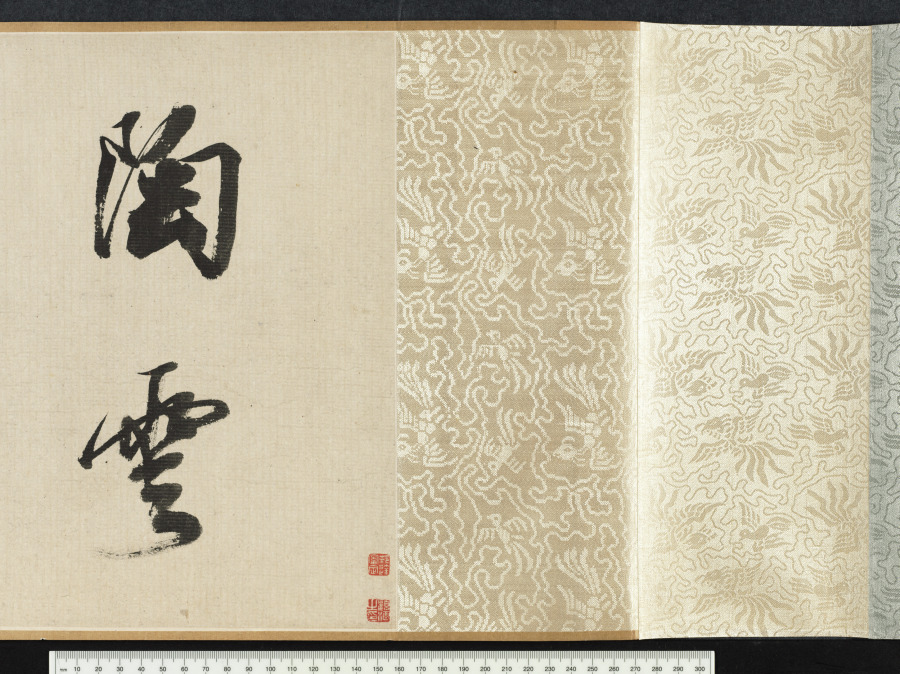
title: Chrysanthemums and Cabbage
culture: China, Ming dynasty (1368–1644)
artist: Tao Cheng (Chinese, active c. 1471–after 1502)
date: c. 1486 or before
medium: handscroll, ink and slight color on paper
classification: Painting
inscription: Artist's seal at beginning of painting: Yun hu 雲湖. Title by Wang Wenzhi 王文治 (1730–1802), date 1756. 2 seals of Wang Wenzhi 王文治 (1730-1802); 3 seals of Ku Yün (n. d.)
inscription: Section A (Chrysanthemums): 1 poem and 1 seal of Zhang Yuanzhen 張元禎 (1437–1507) - Jinshi, 1461; 1 poems and 3 seals of Ni Yue 倪岳 (1444–1501) - Jinshi, 1464; 1 poems and 2 seals of Zhao Xiang 趙祥 (life dates unknown) - Jinshi, 1469; 1 poems and 1 seals of Wu Xixian 吳希賢 (1437–1489) - Jinshi, 1464; 1 poems and 1 seals of Lü Chang 呂㦂 (1449–1511) - Juren, 1471; 1 poems and 3 seals of Fu Han 傅瀚 (1435–1502) - Jinshi, 1464; 1 poems and 1 seals of Feng Jue 馮珏 (life dates unknown) - Jinshi, 1478.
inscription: Chrysanthemums section, poem 1, by Zhang Yuanzhen 張元禎 (1437–1507): Several bushes of chrysanthemums grow in front of the Five-Willow Cottage,/ The yellow ones are really yellow and the white ones white./ This affable and decent fellow, young in years and unsophisticated,/ Has snapped one of the branches to dip in ink. (The Five-Willows Cottage was the home of the poet Tao Qian 陶潛 (Tao Yuanming 陶淵明, AD 365-427).) Chrysanthemums section, poem 2, by Ni Yue 倪岳 (1444–1501): Where at the Eastern Fence can you grieve for the Soul of the Xiang River?/ A man of upright character is mourned within the traces of ink./ White jade with a slight flaw would be a grievance forever,/ Later men should understand why even the roots of the flowers are washed. (Eastern Fence refers again to the poet Tao Qian 陶潛, while the Soul of the Hsiang River refers to the poet Qu Yuan 屈原 (c. 340–278 BC).) Chrysanthemums section, poem 3, by Zhao Xiang 趙祥 (life dates unknown): A clump of chrysanthemum grows in front of the bamboo pavilion,/ The winds of many autumns have blown since we parted beyond the river./ Straining wine through the official's cap of Tao [Qian] to prolong autumn's pleasures,/ The mists and clouds of ten thousand miles belong to the intoxicated. Chrysanthemums section, poem 4, by Wu Xixian 吳希賢 (1437–1489): It is a different spring if mulberry is planted during the latter part of the year,/ The dust of the world originally did not drop on clothing./ Who spills out ink under the Eastern Fence/ And paints so freely this portrait of chrysanthemums for the venerable Sir Tao? Chrysanthemums section, poem 5, by Lü Chang 呂㦂 (1449–1511): This full tray of ink for painting [flowers] at the Eastern Fence;/ Their whiteness or yellowness is not essential in capturing their beauty./ I don't have to go to Jiangnan to see them myself./ At my old house grow two or three branches. Chrysanthemums section, poem 6, by Fu Han 傅瀚 (1435–1502): Who daubed autumn flowers with ink/ As if they were dark dew on a branch tip only vaguely seen at evening?/ After the lazy clouds disperse, no one paints;/ A certain unconventionality pervades this painting. Chrysanthemums section, poem 7, by Feng Jue 馮珏 (life dates unknown): To satisfy his hunger, [the chrysanthemums] have at times entered the poetry of Qu Yuan;/ Taking up the wine cup, it felt close to Tao Qian./ [With them I am like] a lonely root sustained by deep water/ Or an old man to whose hair the color of youth returns.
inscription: Section B (Cabbage): 1 poem and 1 seal of Cai Qi 蔡圻 (life dates unknown) - degree information not known; 1 poems and 3 seals of Ni Yue 倪岳 (1444–1501) - Jinshi, 1464; 1 poem and 3 seals of Jiao Fang 焦芳 (1436–1517) - Jinshi, 1464; 1 poem and 3 seals of Li Dongyang 李東陽 (1447–1516) - Jinshi, 1464; 1 poems and 1 seals of Wu Xixian, signed “Xixian” 吳希賢 - Jinshi, 1464; 1 poems and 3 seals of Fu Han 傅瀚 (1435–1502) - Jinshi, 1464; 1 poems and 1 seals of Lü Chang 呂㦂 (1449–1511) - Juren, 1471; 1 poems and 2 seals of Zhao Xiang 趙祥 (life dates unknown) - Jinshi, 1469; 1 poems and 1 seals of Feng Jue 馮珏 (life dates unknown) - Jinshi, 1478.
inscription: Cabbage section, poem 1, by Cai Qi 蔡圻 (life dates unknown): The ink splashes are fresh from a frosty brush dipped in pond water;/ I can visualize that time when Yunhu 雲湖 [Tao Cheng] first showed his talents./ I lament the places where I scribbled before,/ Who would open them to inscribe a poem? (The first line is an allusion to the famous Jin dynasty calligrapher Wang Xizhi 王羲之 (AD 303-361), who practiced calligraphy so diligently at the edge of a pond that the water turned black with ink.) Cabbage section, poem 2, by Ni Yue 倪岳 (1444–1501): After rain the vegetables begin to grow;/ How are the colors of the masses lately!/ Once you get used to them, the tastiest parts are the ends of the roots;/ I don't know if they can be used for "seasoning soup." ("Seasoning soup" is an allusion to the statesmanship of a chief minister.) Cabbage section, poem 3, by Jiao Fang 焦芳 (1436–1517): This crop of purple stalks and green leaves is late and irregular;/ Now the rainy season is over for the Eastern Garden./ All the nobles nowadays dine on meat;/ Who of them knows the flavor of this [cabbage]. Cabbage section, poem 4, by Li Dongyang 李東陽 (1447–1516): It's always helped the honest man to sober up after drinks./ I intend to go to the deepest part of the stream-crossed garden/ To refresh myself in the fragrance and dew of evening. Cabbage section, poem 5, by Wu Xixian 吳希賢 (1437–1489): After rain, the white silk is filled with fragrant vegetables;/ How many times this happens in Mr. Tao's paintings./ On whom will you depend to present a memorial to the ruler?/ Don't let this color emerge on the faces of the people. (The last line is meant as a warning to officials: the color of the vegetables (green) may be pleasing in itself, but when it emerges on the faces of the starving poor, it signifies a badly governed world.) Cabbage section, poem 6, by Fu Han 傅瀚 (1435–1502): For twenty years I have feasted on the excellent mutton of an official;/ Yet I talk and dream about the garden and its vegetables./ Do not merely say it is good to chew the root of the cabbage--/ You must taste to understand what poverty is. Cabbage section, poem 7, by Lu Chang 呂㦂 (1449–1511): The capital is never a place for an apprentice in the "garden of scholarship."/ Who would write about gardens and vegetables on an examination paper?/ I've walked throughout the country in spring;/ Make sure the people don't show this color. Cabbage section, poem 8, by Zhao Xiang 趙祥 (life dates unknown): After a wash of rain, the spring garden is still in order;/ The flavor [of the cabbage] is more suitable with a small drink and the hum of a tune./ The rich and powerful in their mansions consume dish after dish of meat;/ Vegetarian food is known only by the scholars. Cabbage section, poem 9, by Feng Jue 馮珏 (life dates unknown): A new cabbage is nourished with dew;/ It takes a long time to grow and mature./ The business of "seasoning the soup" is your responsibility;/ Better command the gardener to take care [of the cabbages]. trans. HK/LYSL/WKH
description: On an autumn day in Beijing, Tao Cheng had a gathering with a group of scholar-officials and created two paintings in a spontaneous, casual style. The first depicts chrysanthemums, slender bamboo stalks, and a rock in monochrome ink. Tao applied light colors for the second painting that depicts cabbage. Tao deliberately placed the images on the first sections of the paper so that his honorable guests could add their poetic inscriptions inspired by his imagery. In the first section to the right, all seven poetic inscriptions refer to the beloved poet and recluse Tao Qian (also called Tao Yuanming, AD 365–427) who was particularly known for his profound love for chrysanthemum flowers. Most of the inscriptions in the second section express sympathy for the poor, since cabbage is the main ingredient in their humble food. Taken together, the poems and paintings allude to the life and responsibilities of the scholar-official: the importance of both an upright character and a concern for the poor citizens in order to achieve good government.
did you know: Eminent calligrapher Wang Wenzhi 王文治 was only 27 sui when he wrote the title in 1756.